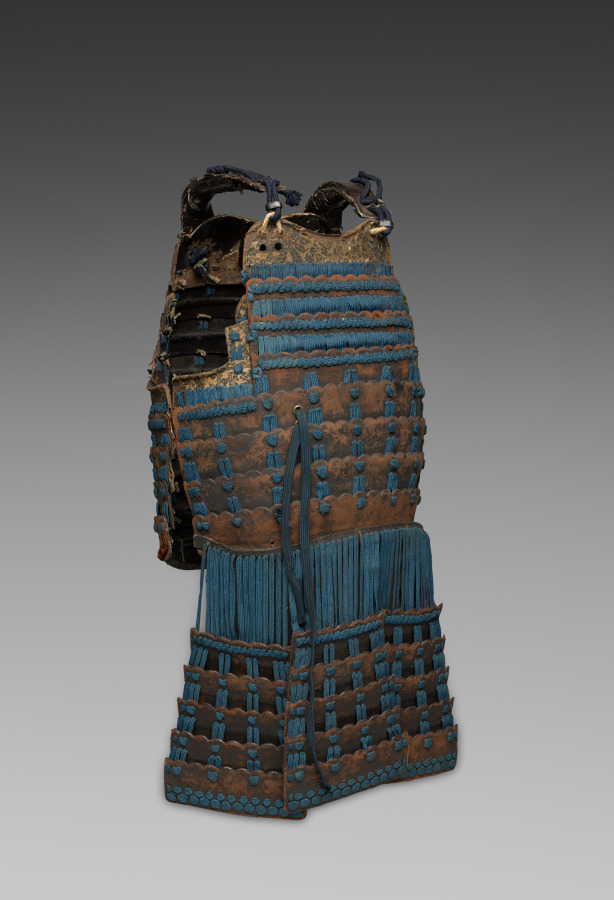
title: Cuirass (Dō)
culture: Japan, Edo period (1615–1868)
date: 1615–1868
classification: Arms and Armor